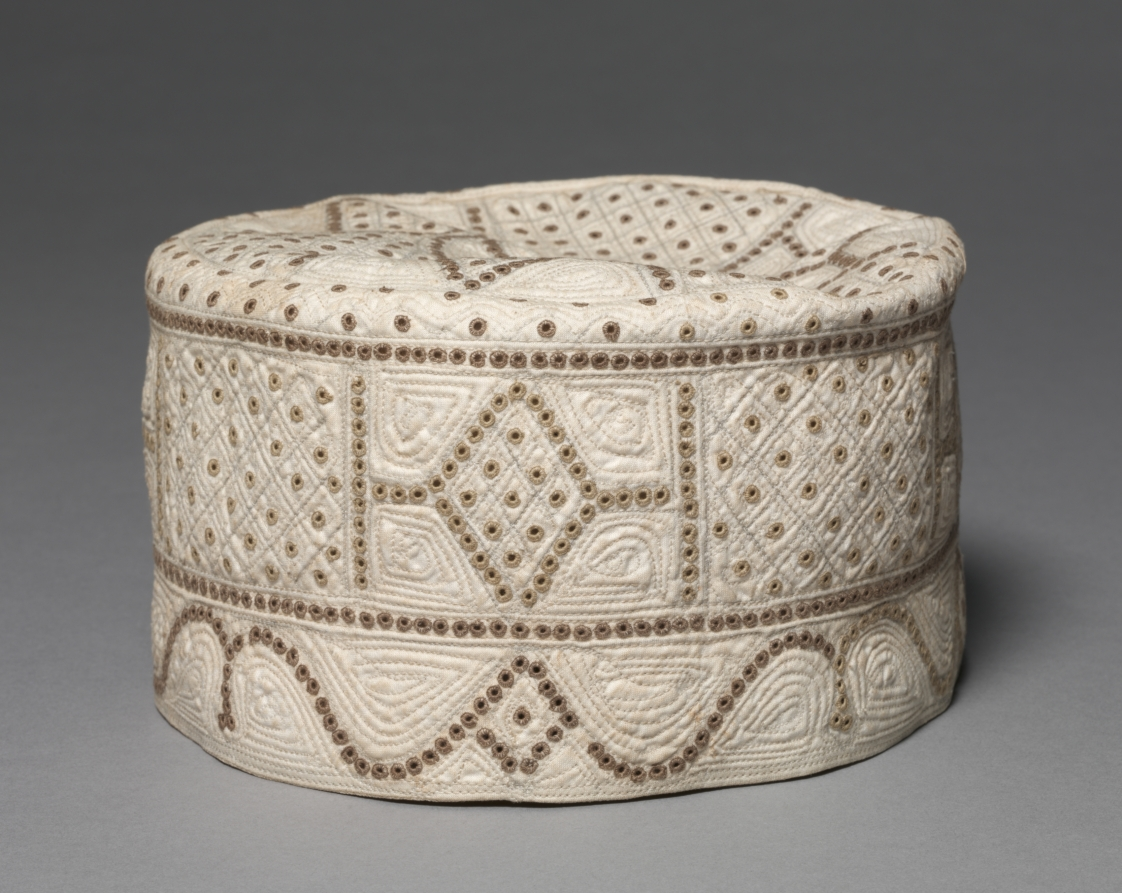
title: Cap (kofia ya kiua or barghashia)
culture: Africa, East Africa, Tanzania, Zanzibar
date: 1900s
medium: cotton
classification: Garment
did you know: The small holes in this cap allow air to circulate, keeping the wearer's head cool.